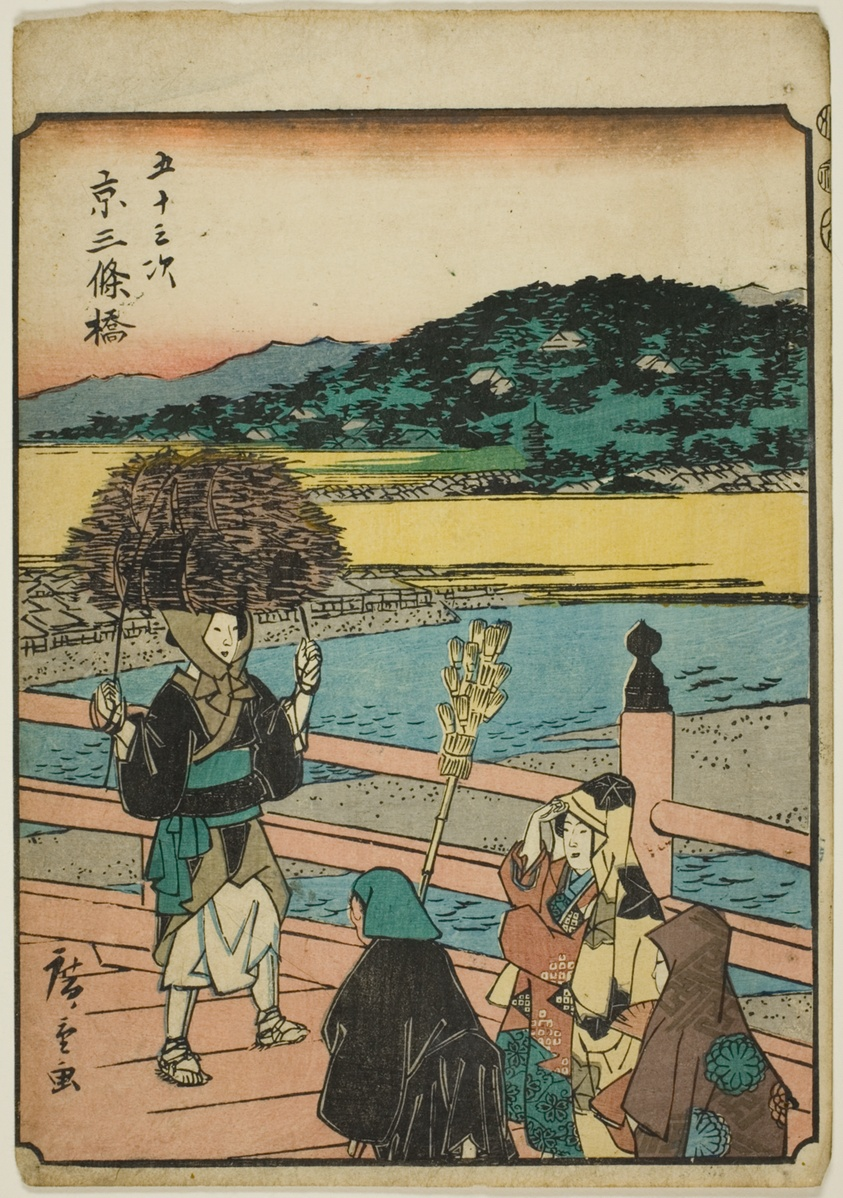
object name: Print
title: Kyoto: Sanjo Bridge (Kyo, Sanjobashi), from the series "Fifty-three Stations [of the Tokaido] (Gojusan tsugi)," also known as the Figure Tokaido (Jinbutsu Tokaido)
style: Japanese (culture or style)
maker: Utagawa Hiroshige 歌川 広重; Japanese, 1797-1858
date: 1852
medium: Color woodblock print; chuban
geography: Japan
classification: woodblock print; print